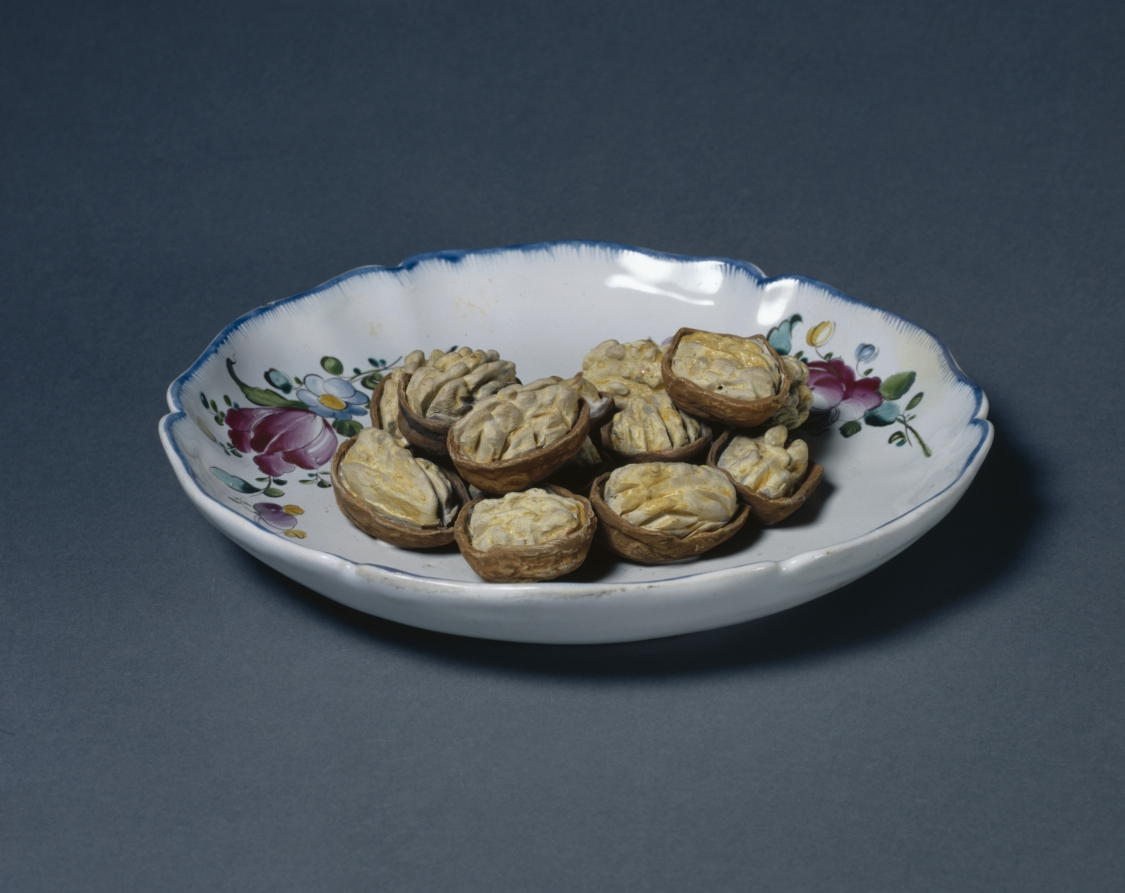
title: Plate of Walnuts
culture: France, Sceaux, 18th century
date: c. 1770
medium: faience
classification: Ceramic